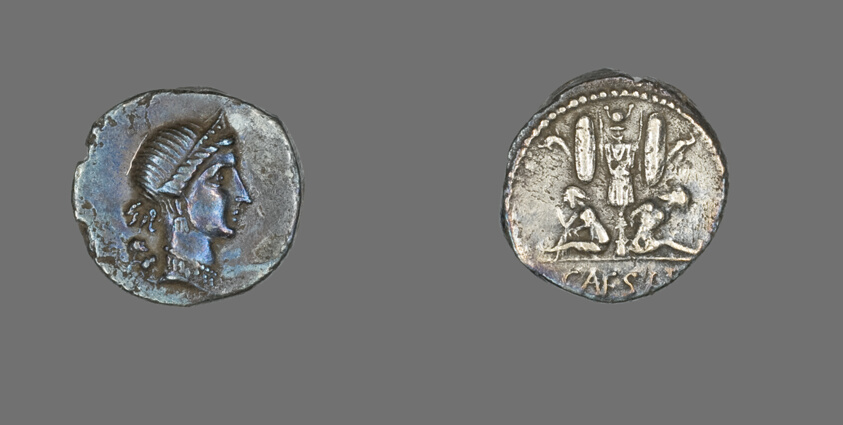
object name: Coin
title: Denarius (Coin) Depicting the Goddess Venus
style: roman (ancient, style or period), ancient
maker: Roman, minted in Spain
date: 46-45 BCE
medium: Silver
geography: Roman Empire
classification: coin; ancient art